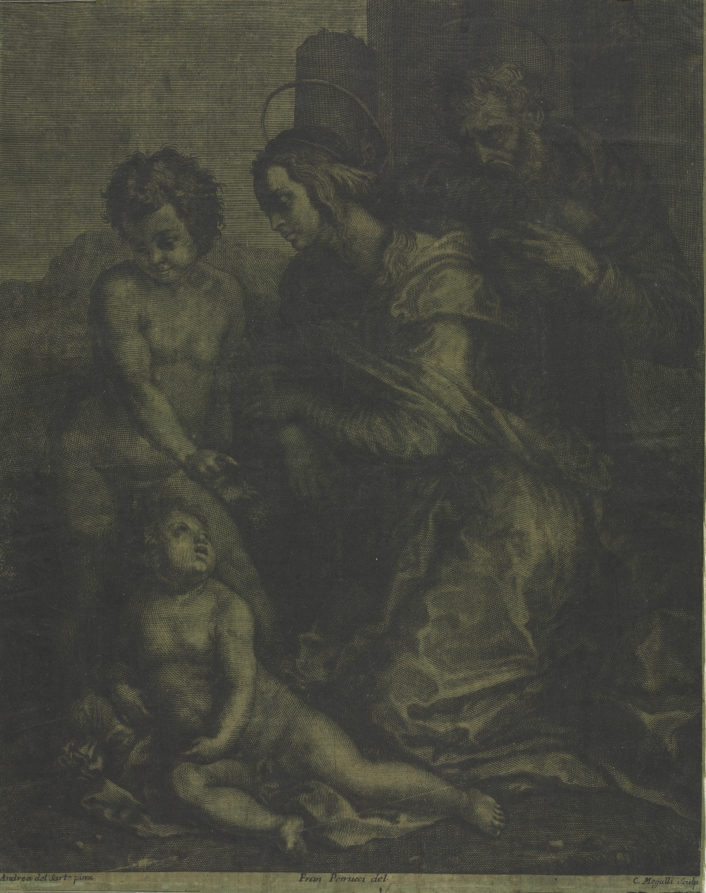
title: The Holy Family with Saint John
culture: Italy, 18th century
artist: Cosimo Mogalli (Italian, 1667–1730)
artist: after Andrea del Sarto (Italian, 1486–1530)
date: c. 1710–1715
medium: engraving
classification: Print